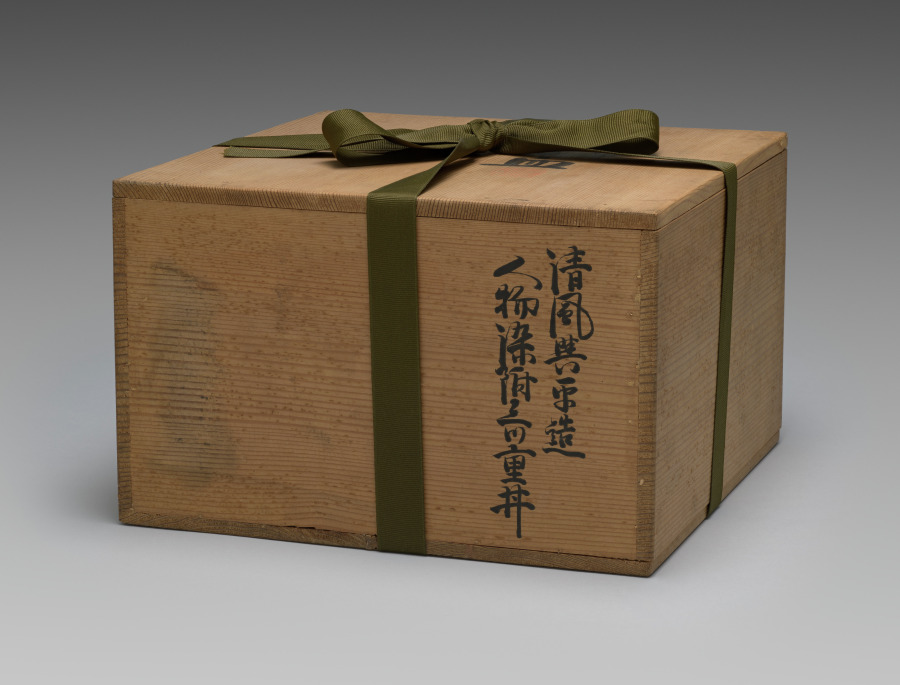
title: Nesting Bowls with Daoist Immortals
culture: Japan, Meiji period (1868–1912)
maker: Seifū Yohei III (Japanese, 1851–1914)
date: 1893–1914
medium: Set of three bowls; porcelain with underglaze blue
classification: Ceramic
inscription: 清風与平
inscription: 大日本清風造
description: Yohei III was capable of ink painting–like compositions in underglaze blue, as well as more decorative ones like that on this set of three nesting bowls. Bowls with very similar designs in five colors were produced in the reign of the Wanli emperor (r. 1572–1620) during the Ming dynasty, and Yohei must have had direct access to one of these or to a close copy. A scene of Daoist immortals is presented on the bowls. On each one, the ground plane is defined with a blue wash. Four lanterns are evenly spaced around the bowl. Two are flanked with linked-piece metalwork banners of the seven treasures. The alternate altars are adorned with textile banners. In between them are four immortals, each standing beneath a tree with small plants surrounding his feet. Two of the immortals hold fruit on a tray. Another carries an elixir-filled ewer and a willow branch. The fourth holds a swastika (manji), here an auspicious symbol, and a flower. Curiously, the inscription inside each footring reads “Made by Seifu of Great Japan,” in emulation of the dynasty and reign inscriptions that appear on Chinese ceramics; however, one can also see through the translucent glaze another inscription, “Seifu Yohei,” written in large characters within a double band of blue on the largest bowl.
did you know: In the bottom of each bowl is a scene of two robed immortals who appear to stand on a precipice in a mountainous landscape high in the clouds, with celestial orbs over their heads.